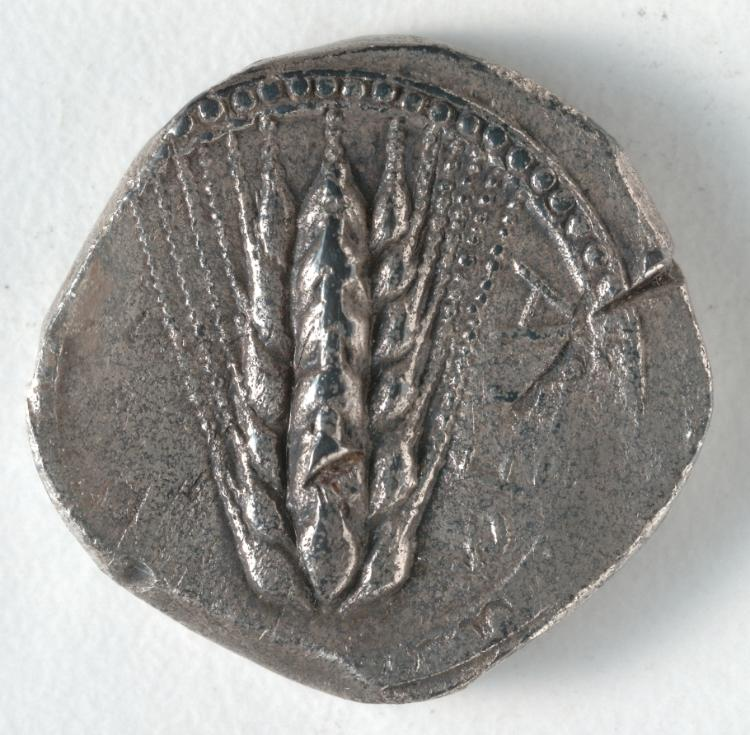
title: Stater: Barley (obverse)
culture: Greek, minted at Metapontion (South Italy)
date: c. 530–510 BCE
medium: silver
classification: Coins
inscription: ΜΕΤΑ